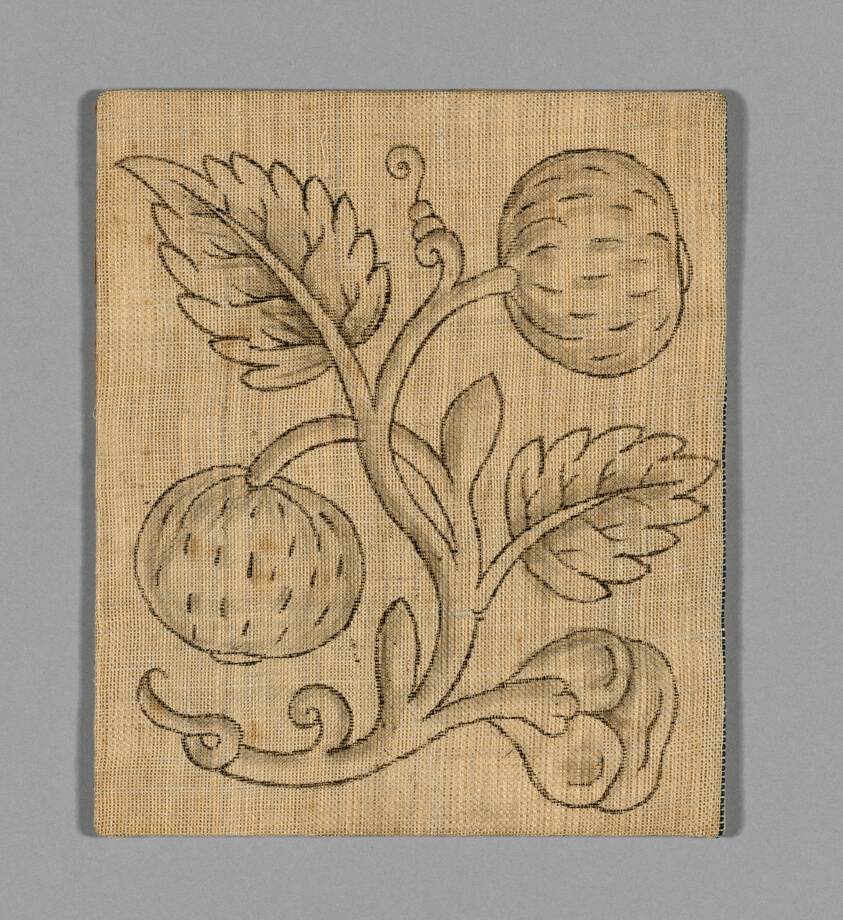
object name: Textile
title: Needlework Pattern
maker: England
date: 17th century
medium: Linen, plain weave with pencil and pen drawn floral design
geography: England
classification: textile; patterns (guides); accessories (object genre); needlework (visual works)